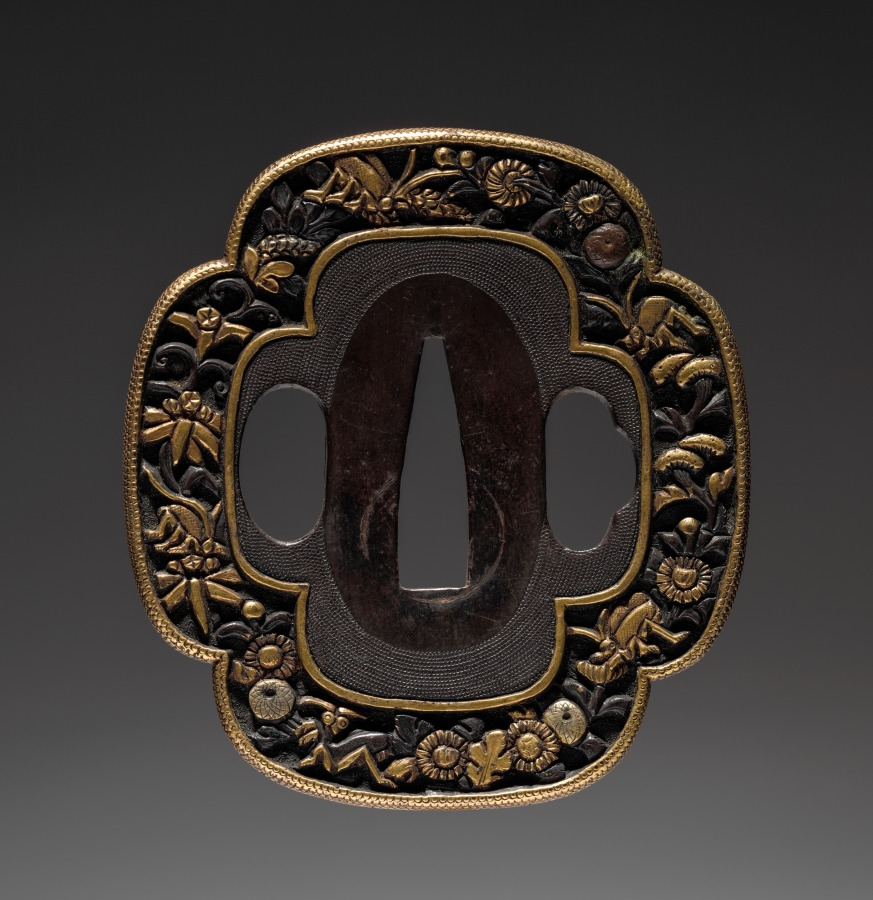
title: Sword Guard (Tsuba) with Insects and Flowers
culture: Japan, possibly Edo period (1615–1868)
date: c. 1615–1868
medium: metal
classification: Arms and Armor